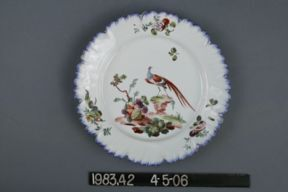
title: Plate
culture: France, 18th century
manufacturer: Sceaux Factory (French, active 1748–66)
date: c. 1770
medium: faience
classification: Ceramic